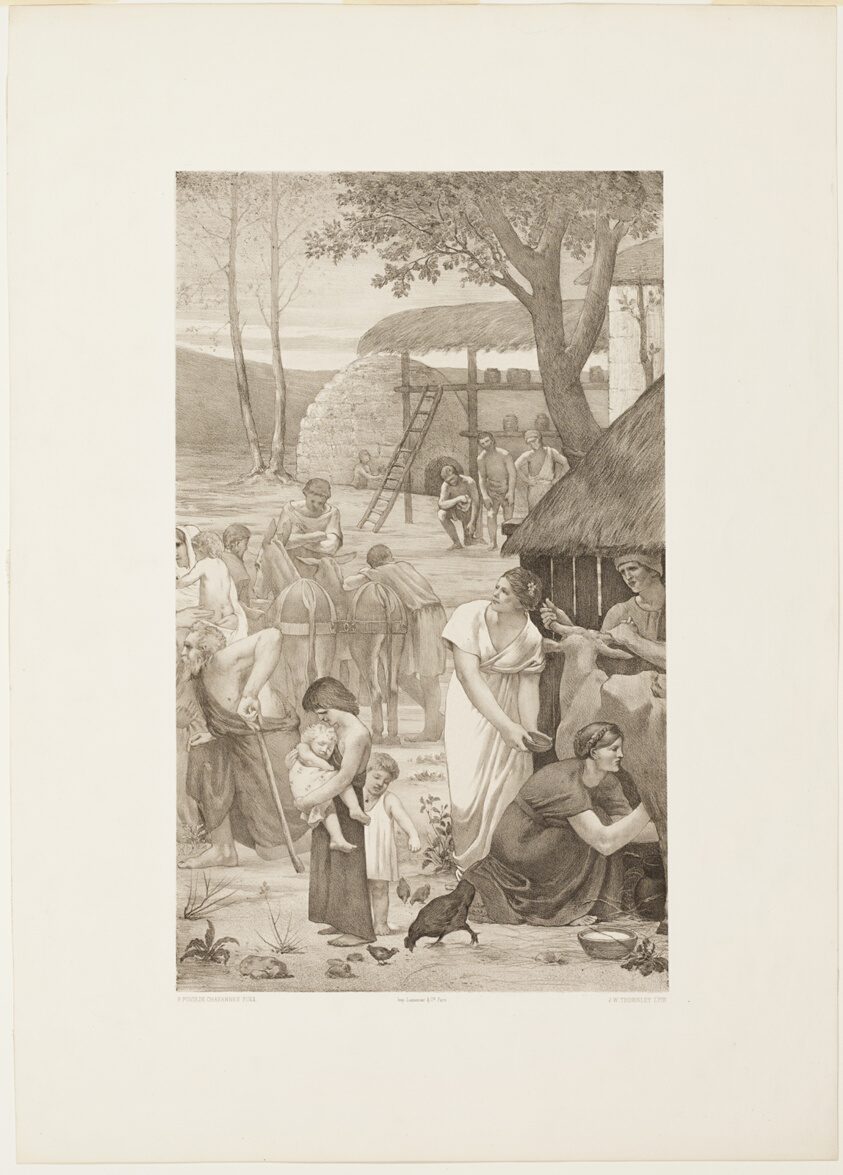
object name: Print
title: Pastoral Life of Saint Geneviève (right panel)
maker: Georges-William Thornley (French, 1857-1935); after Pierre Puvis de Chavannes (French, 1824-1898)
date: c. 1888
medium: Lithograph on paper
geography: France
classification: lithograph; print; prints and drawing